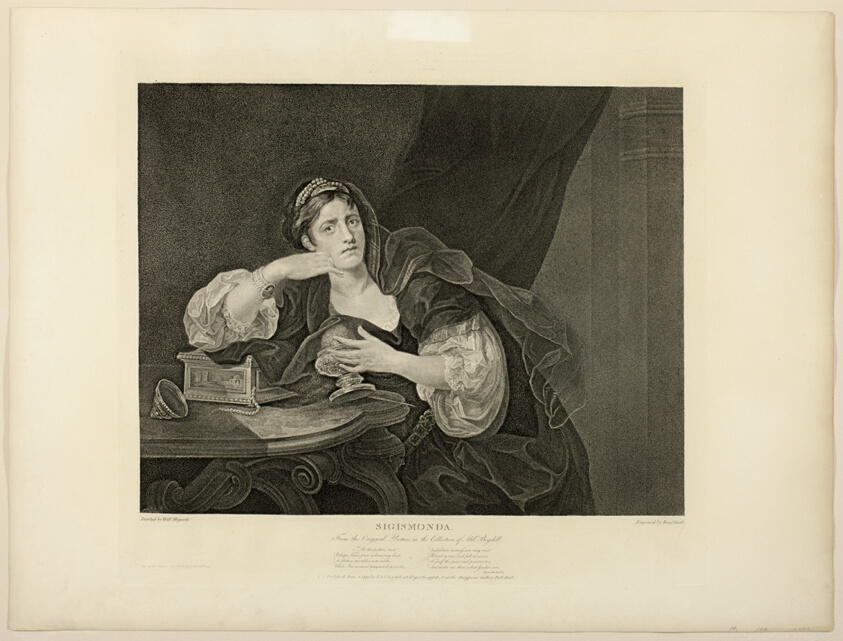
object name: Print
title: Sigismonda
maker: Benjamin Smith (English, d. 1833); after William Hogarth (English, 1697-1764); published by J. & J. Boydell (English, 1719-1804)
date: published June 4, 1795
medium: Engraving in black on tan wove paper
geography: England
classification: engraving; print; prints and drawing